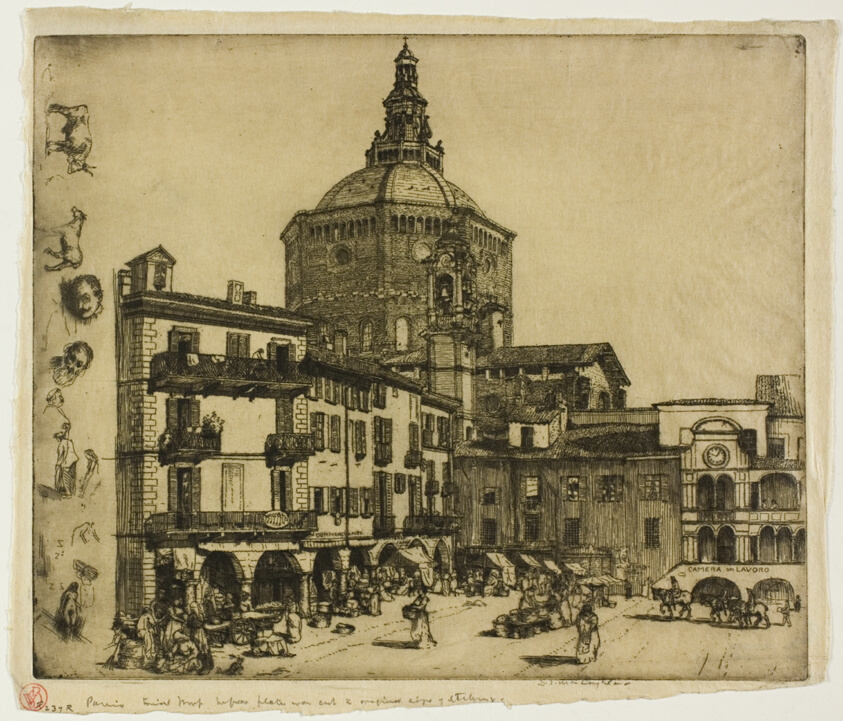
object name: Print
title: Pavia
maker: Donald Shaw MacLaughlan (American, born Canada, 1876-1938)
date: 1904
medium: Etching in black on cream wove paper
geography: United States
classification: etching; print; prints and drawing